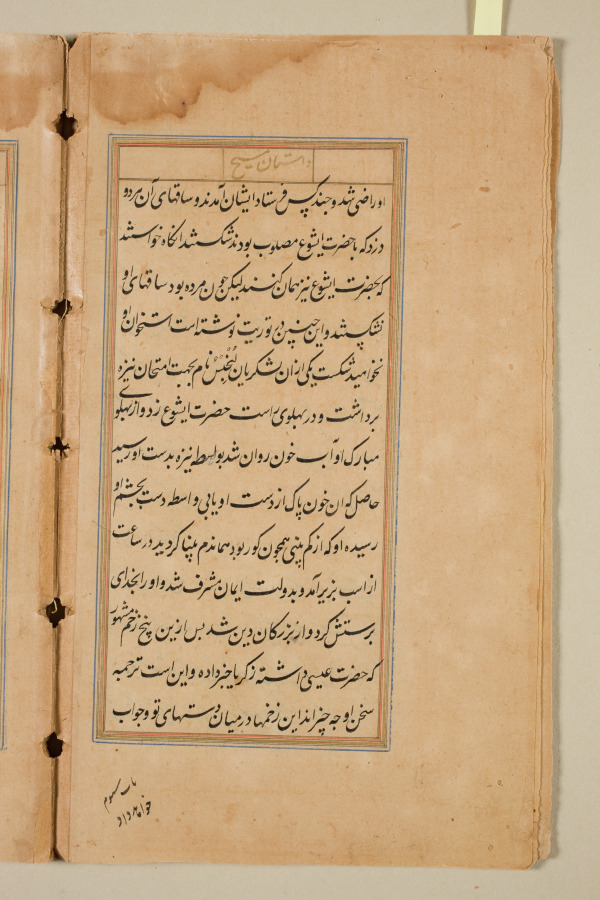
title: Text page from a Mirror of Holiness (Mir’at al-quds) of Father Jerome Xavier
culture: Mughal India, Allahabad, made for Prince Salim (1569–1627)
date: 1602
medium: Ink and gold on paper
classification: Manuscript